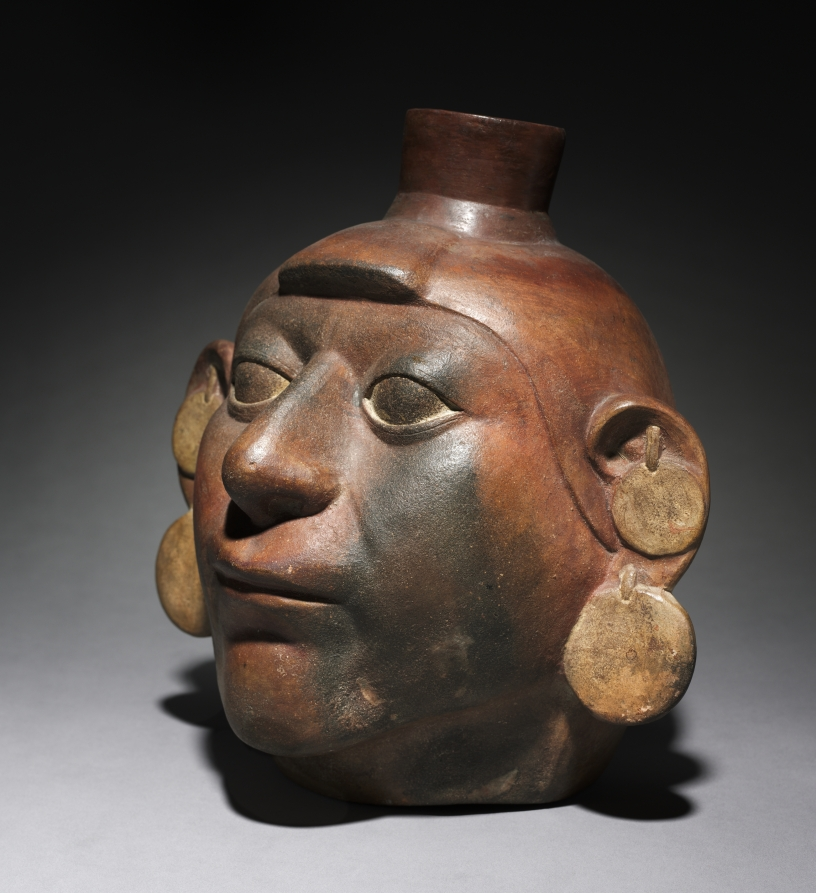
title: Portrait Head Vessel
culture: Peru, North Coast, Moche style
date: 200–550 CE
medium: earthenware with colored slips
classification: Ceramic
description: The Moche were unique in ancient Peru in creating realistic human portraits, usually in the form of ceramic vessels. This large example may represent an important captive who, like some Moche prisoner figures, wears double earrings and a hank of hair over the forehead.